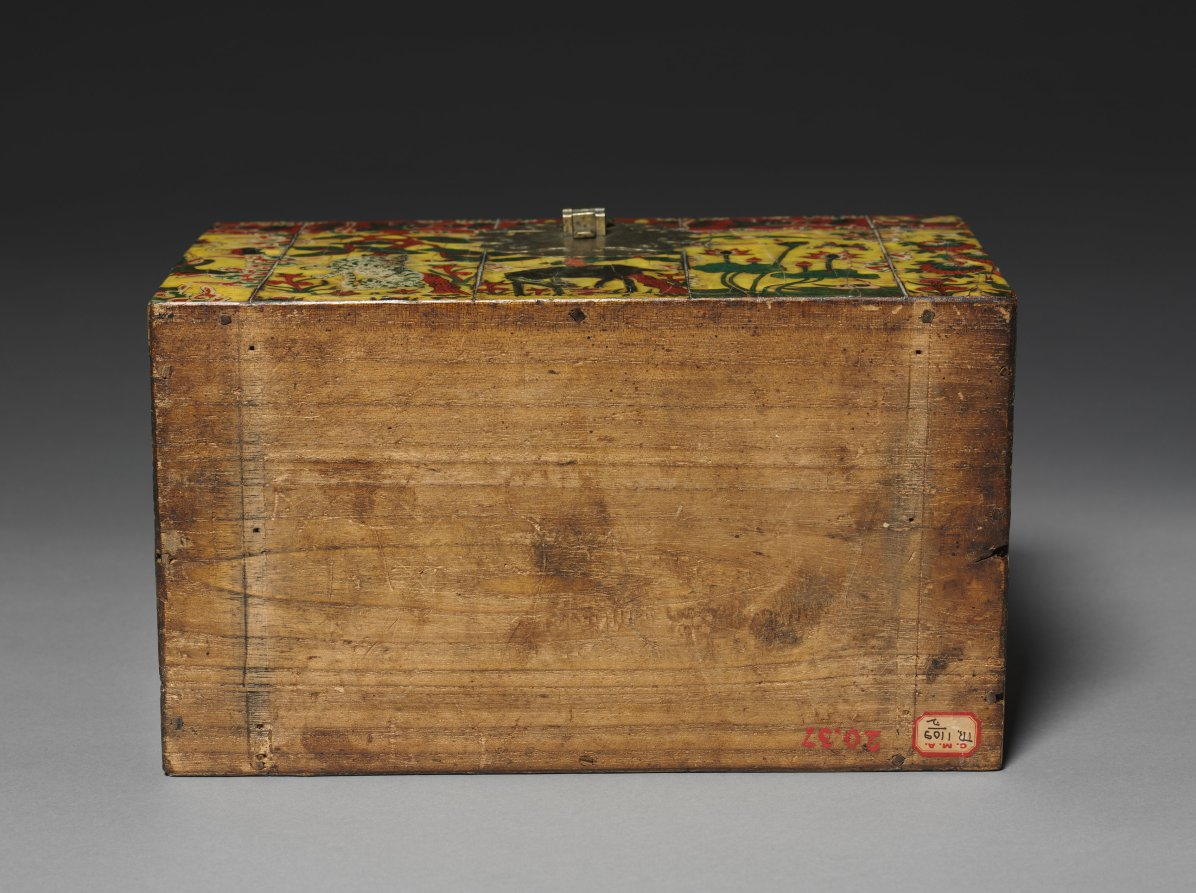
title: Box with Painted Oxhorn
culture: Korea, Joseon dynasty (1392–1910)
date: 1800s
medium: painted wood with flattened ox-horn inlay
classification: Miscellaneous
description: This box is colorfully decorated with the technique of oxhorn plating. The oxhorn was cut, soaked in water, boiled, and then pressed into thin translucent sheets. Since oxhorns are usually rather small, dozens of them were required to fully decorate even a small wooden object. This box is colorfully painted with the imagery of auspicious plants and animals such as dragons amid clouds, a white tiger under the pine tree, a grazing deer, and more. This kind of luxurious box was probably produced as a wedding gift.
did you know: This box is made of small flattened pieces of oxhorn. Since oxhorn is usually rather small, possibly dozens of them were used to fully decorate even a small wooden object like this box.